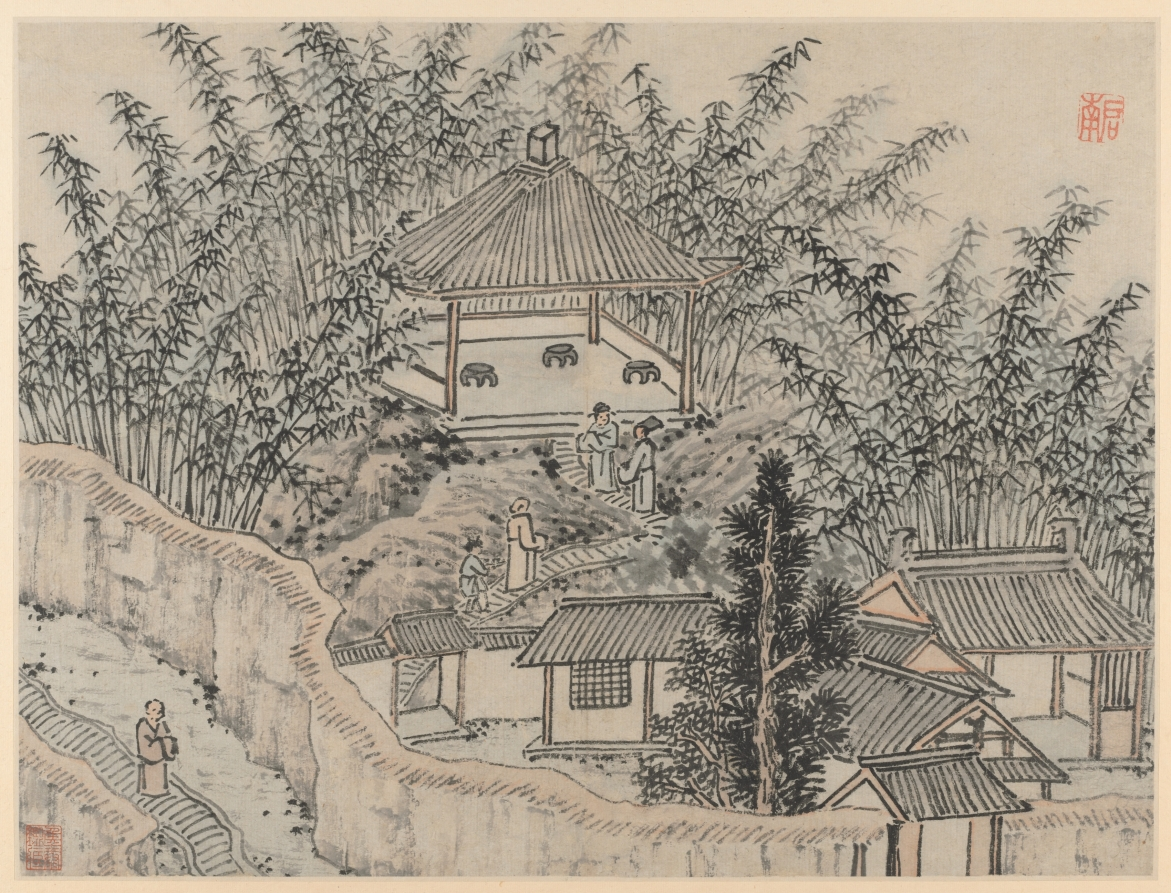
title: Bamboo Pavilion, Tiger Hill, from Twelve Views of Tiger Hill, Suzhou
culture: China, Ming dynasty (1368–1644)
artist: Shen Zhou (Chinese, 1427–1509)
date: after 1490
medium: Album leaf; ink on paper or ink and slight color on paper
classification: Painting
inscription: [印] 启南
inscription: seal of Hou Shigong 侯士恭 [late 19th–early 20th century]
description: Views of Tiger Hill depicts a historic site a few miles northwest of Suzhou. The scenes simulate a visit from arriving by boat at the foot of the mountain to climbing to Cloudy Cliff Monastery. Representations of the artist’s mature style, Shen Zhou included views in subtle colors in the suite of monochrome scenes. A Suzhou native, Shen Zhou was supported by family wealth and rejected an official career in favor of life as a retired scholar. Turning to painting in midlife, he is regarded as the founder of the Wu School of painting, with its center in Suzhou.